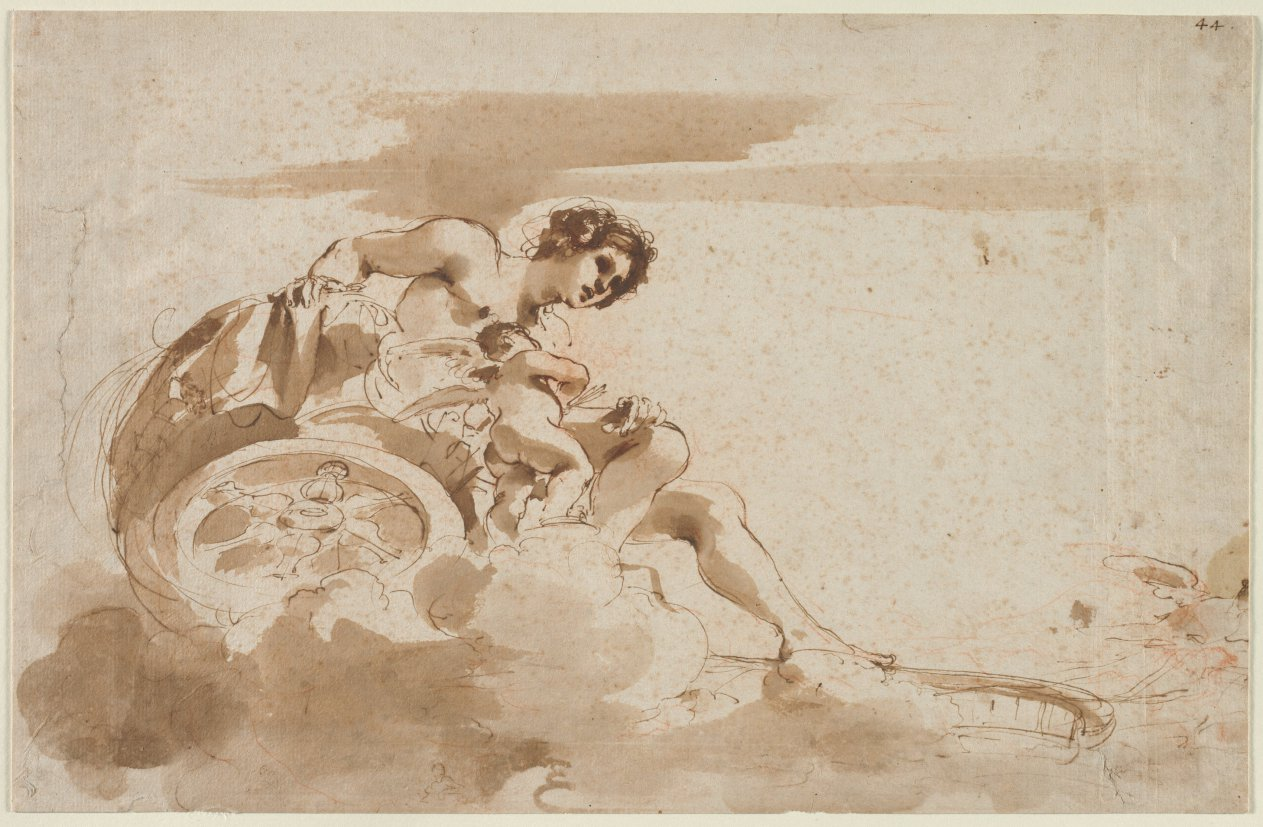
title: Venus and Cupid in a Chariot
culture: Italy, Bologna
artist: Guercino (Italian, 1591–1666)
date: 1615–17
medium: Pen and brown ink and brush and brown wash over red chalk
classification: Drawing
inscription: upper right, in brown ink: 44 .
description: Giovanni Francesco Barbiere, called Guercino, was a prolific draftsman who used drawing not only to prepare for his many painting commissions but also to record and explore his ideas for future use. This preparatory drawing, made early in his career, reflects Guercino's nonlinear preparatory process and his simultaneous work on different compositions. It relates in format to the painted decoration at the Casa Pannini in his native town of Cento, but it features Venus instead of Diana as in the finished fresco. Guercino's combination of rapid and sure pen lines with ink wash, applied with expert variegation to create deep shadows and bright highlights, is a paradigm of the artist's exuberant high Baroque style.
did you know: Two miniscule female forms appear at the bottom edge of the sheet and may pertain to an earlier idea for the composition or to one of many other compositions Guercino conceived for the commission.